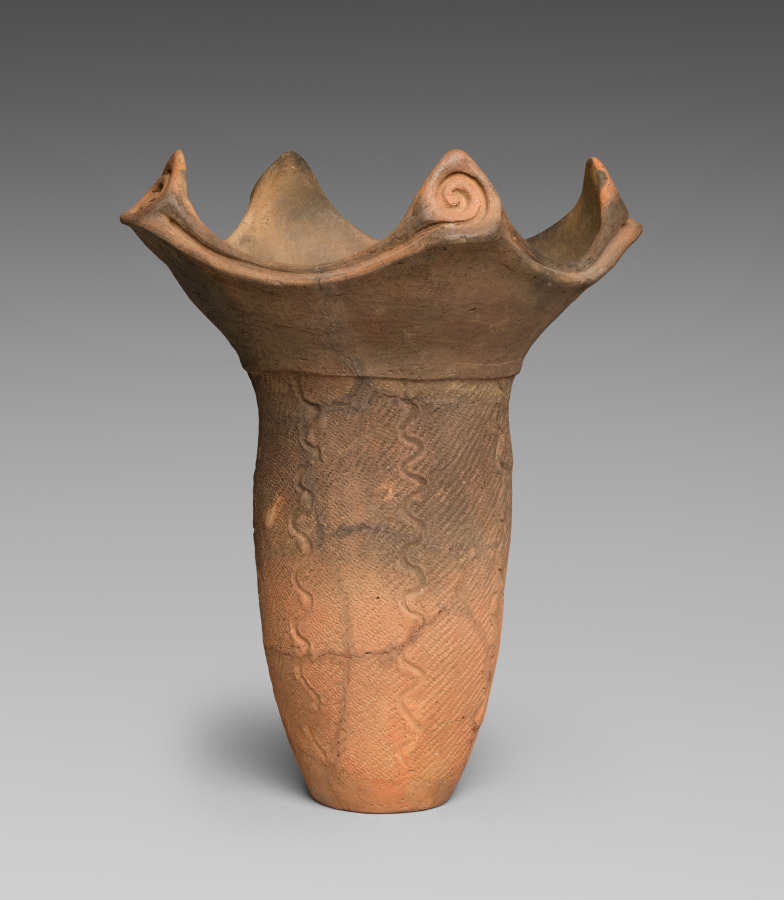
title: Deep Vessel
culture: Japan, Jōmon period (c. 10,500–300 BCE)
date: c. 2500 BCE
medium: Earthenware with impressed and carved decoration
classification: Ceramic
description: This cooking vessel was formed by piling coils of clay atop one another, smoothing and thinning the walls, and then adding surface decoration. Vertical incised squiggle lines as well as diagonal impressed cord patterns create texture. The mouth rises in four dramatic triangular forms, each with a coiled design inside.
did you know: Jōmon, impressed rope patterns, are typical of vessels of this era, so archaeologists named the period after them.